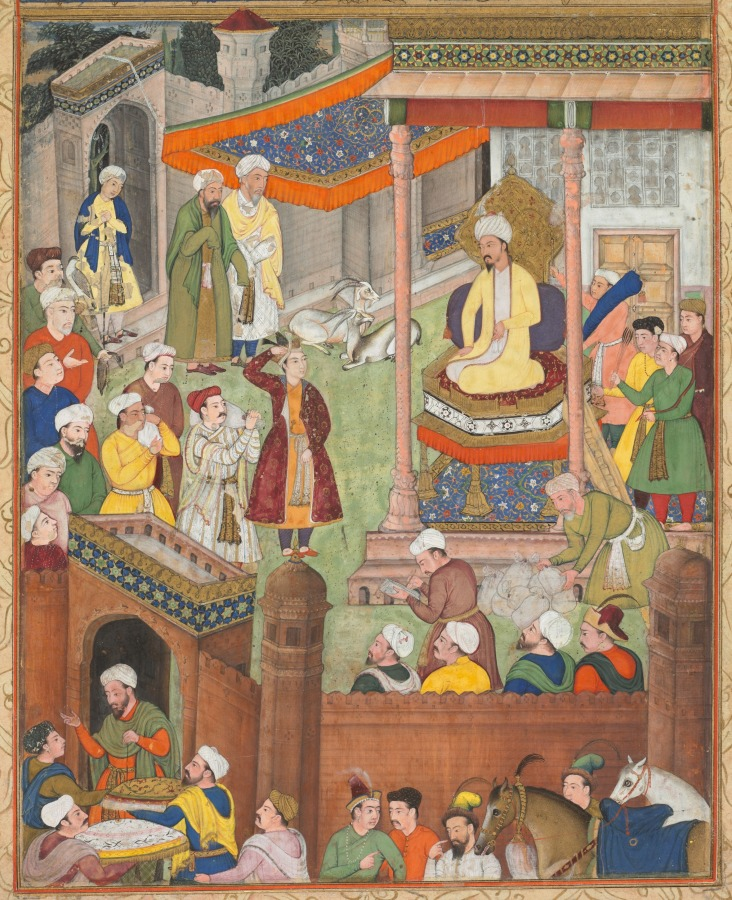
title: Babur receives booty and Humayun’s salute after the victory over Sultan Ibrahim in 1526, from an Akbar-nama (Book of Akbar) of Abu’l Fazl (Indian, 1551–1602)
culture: Mughal India, court of Akbar (reigned 1556–1605)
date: c. 1596–1597 or 1604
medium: Gum tempera and gold on paper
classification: Painting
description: The first Mughal emperor Babur sits enthroned as men bring gifts and sacks of tribute to mark a successful expansion of his territories. Emblematic of his role in leading the victory, his son Humayun wears a wine-and-gold robe of honor despite the Delhi heat in late April. Marking the royal space are a carpet and canopy painted with a lapis lazuli ground. The floral vine motif called arabesque swirls around a central lobed medallion. These delicate patterns are inspired from Persian manuscript illuminations. Contemporary historians describe awnings of gold embroidery, brocade, and velvet along with colorful carpets resembling a beautiful flower bed.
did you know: A clerk records the amount of tribute that Babur received from conquered kings.